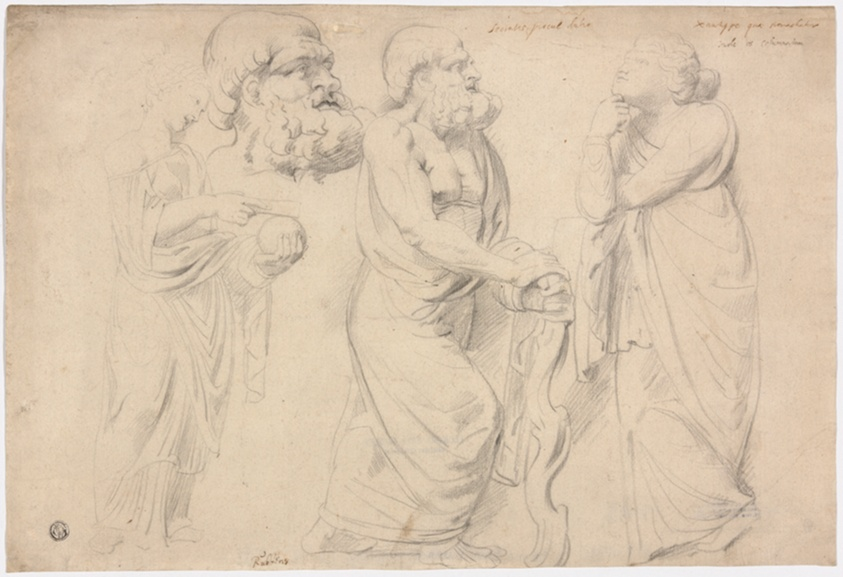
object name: Drawing and Watercolor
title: Studies of a Roman Sarcophagus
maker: Peter Paul Rubens (Flemish, 1577-1640)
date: 1602/03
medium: Black chalk on cream laid paper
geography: Flanders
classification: graphite; drawings (visual works); prints and drawing